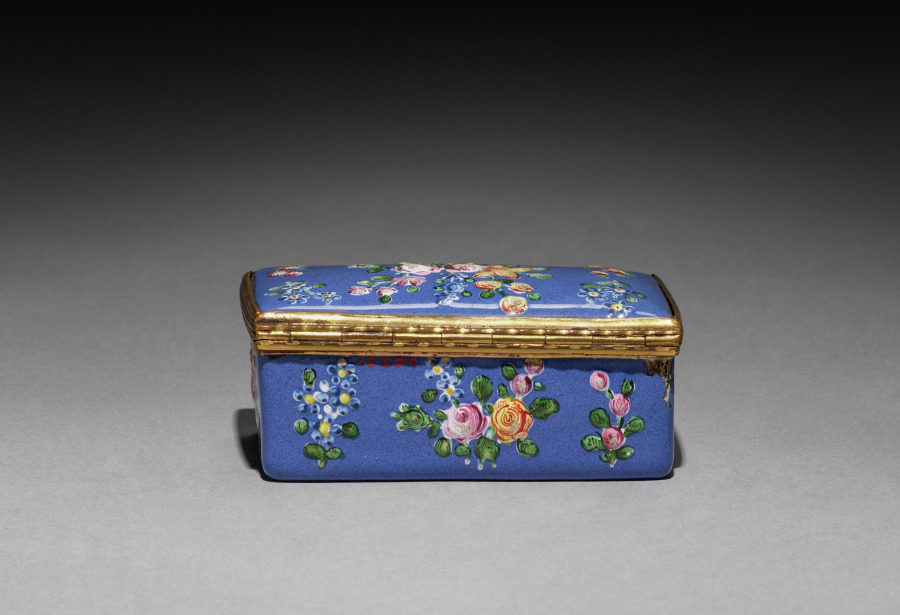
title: Snuff Box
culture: Germany ?, 19th century (?)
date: 1800s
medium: enamel on copper with metal mounts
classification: Miscellaneous